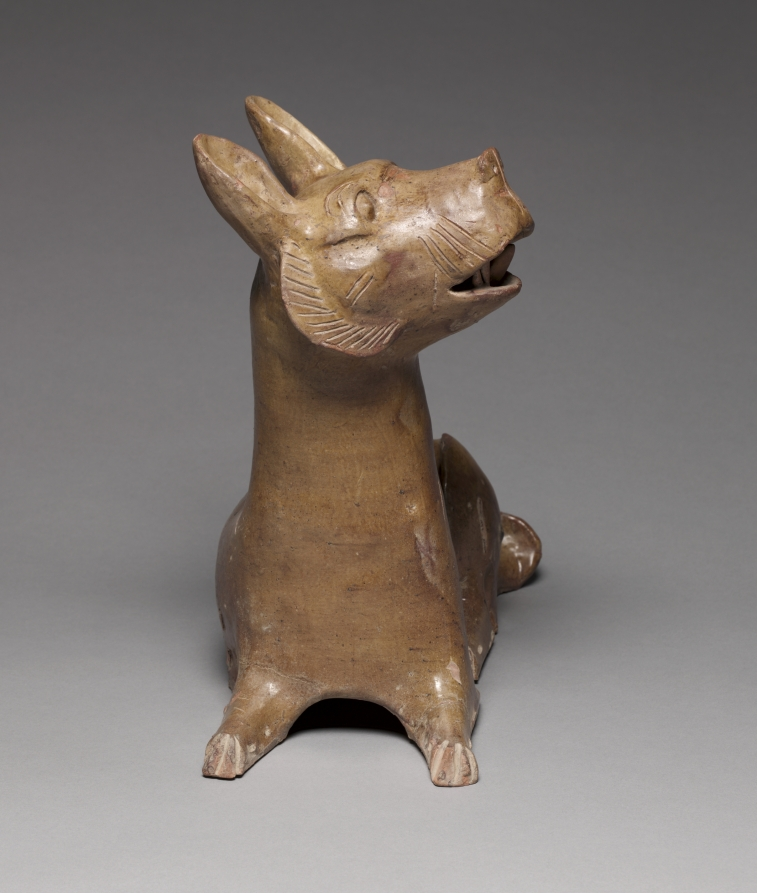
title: Dog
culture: China, Eastern Han dynasty (25–220 CE)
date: 25–220 CE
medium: earthenware with lead glaze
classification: Sculpture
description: Modeled with a lively naturalism and light humor, this dog reflects the worldly tastes of Han China. It differs from the solemn animal images on ritual bronze vessels, which served as the medium for communication with the supernatural realms. The Han people held beliefs in a worldly paradise and an otherworldly realm of eternal life and happiness.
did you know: The dog's muzzle, whiskers, and neck scruff were boldly incised into the earthenware form.